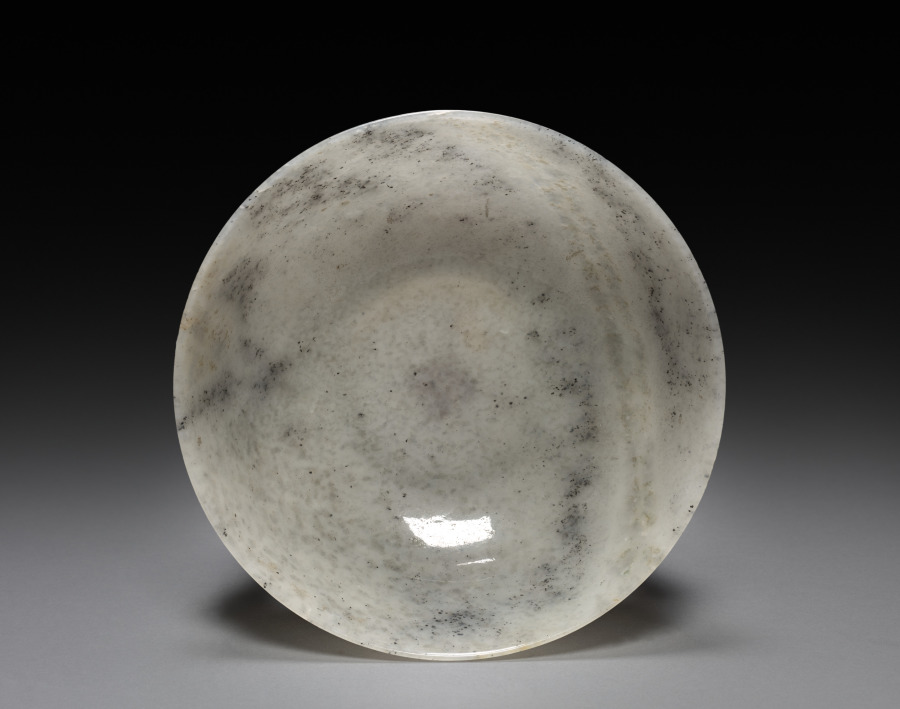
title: Bowl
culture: China, Qing dynasty (1644-1911), Qianlong mark and reign (1736-95)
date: 1736–95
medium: jade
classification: Jade